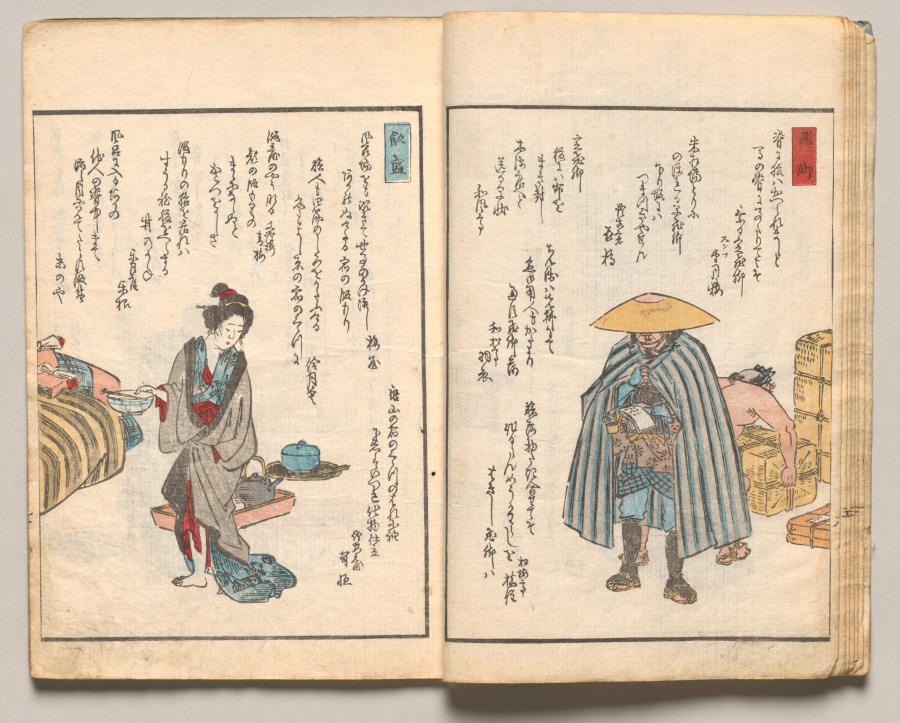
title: Spread Seven from Volume Two of People of Japan in Light Verse (Kyōka)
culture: Japan, Edo period (1615–1868)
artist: Utagawa Hiroshige (Japanese, 1797–1858)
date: 1857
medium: Woodblock-printed book; ink and color on paper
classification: Bound Volume